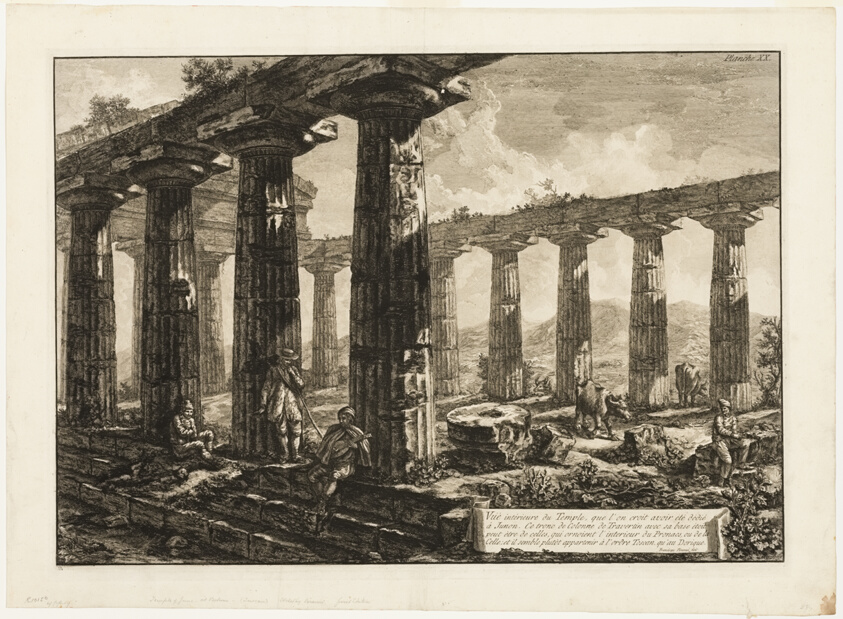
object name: Print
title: Interior View of the Temple Which is Believed to Have Been Dedicated to Juno, from Different views of Paestum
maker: Giovanni Battista Piranesi (Italian, 1720-1778)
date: 1778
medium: Etching on ivory laid paper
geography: Italy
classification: etching; print; prints and drawing